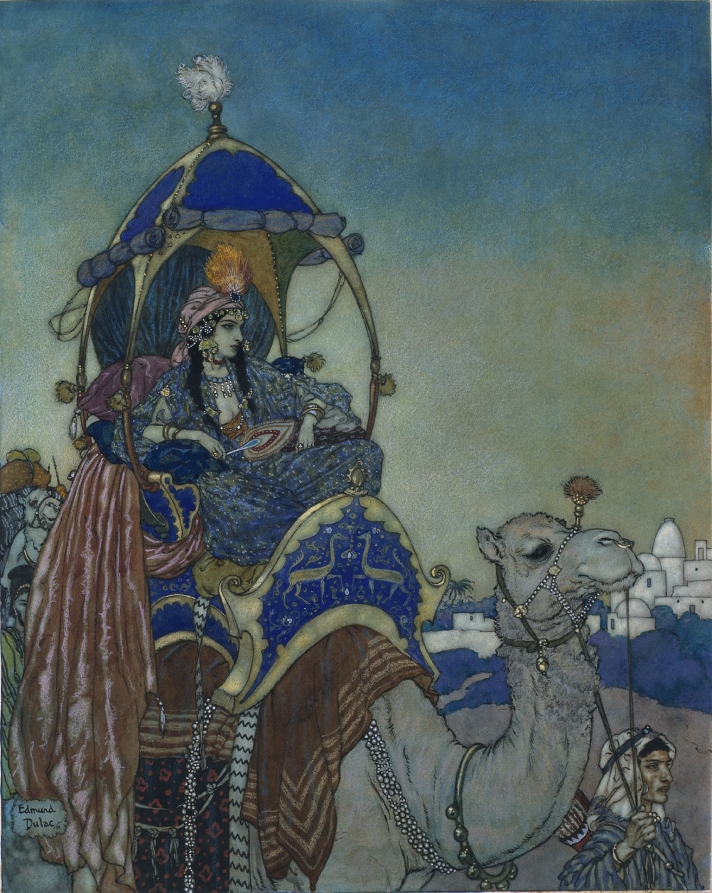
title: The Queen of Sheba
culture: England, 20th century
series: L’Illustration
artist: Edmund Dulac (British, 1882–1953)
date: 1911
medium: Pen and brown ink, watercolor, and gouache, with graphite and color wax crayon, on artist’s drawing board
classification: Drawing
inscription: signed and dated, in black ink, at lower left: Edmund / Dulac 11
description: A celebrated artist of the golden age of British book illustration, the French-born Edmund Dulac was inspired by Persian miniatures and manuscript illustration. This watercolor was one of a series of four scenes painted to accompany a poem by André Dumas, Figures of the Orient. Dulac depicted legendary enchantresses of the East: Circe, Salome, Scheherazade, and here, the Queen of Sheba. Aloft a camel, the dark-haired beauty languorously surveys the arid landscape as she and her entourage approach the Holy Land. Vibrant silks spill out of the queen’s gold and lapis howdah, a veritable mosaic of texture and pattern.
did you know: Edmund Dulac was such a devoted Anglophile that as a student his contemporaries referred to him as "l'Anglais" (English).